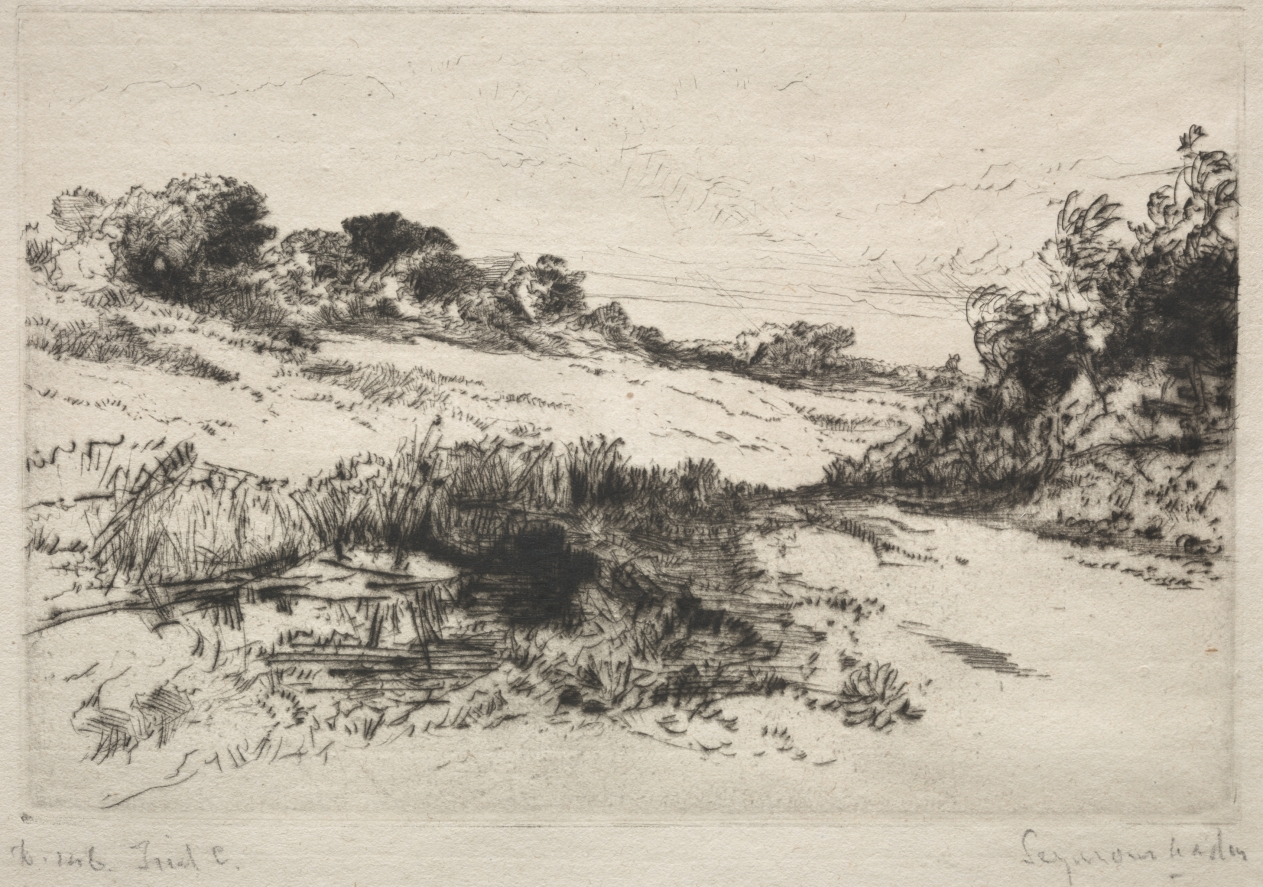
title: Windmill Hill, No. 1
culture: England, 19th century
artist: Francis Seymour Haden (British, 1818–1910)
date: 1877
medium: drypoint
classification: Print